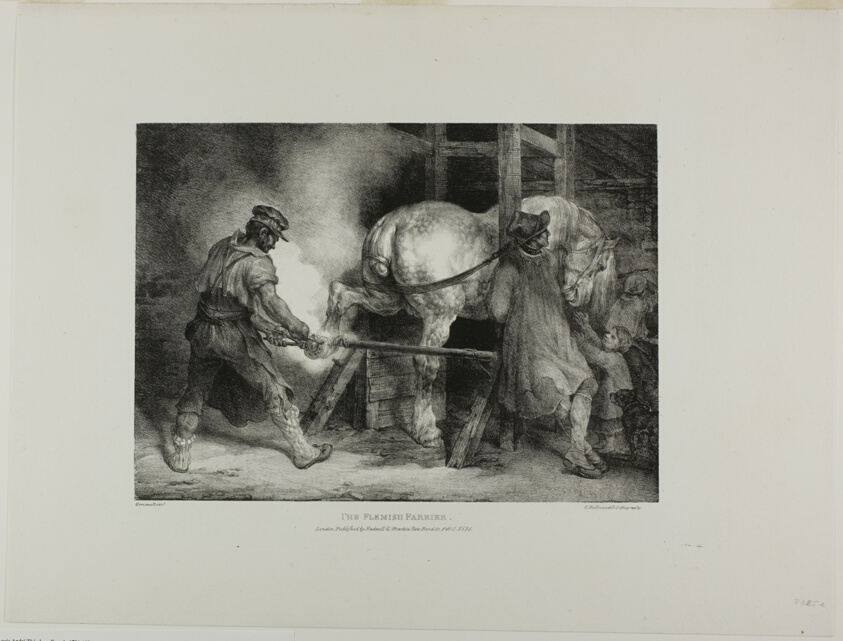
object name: Print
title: The Flemish Farrier, plate 4 from Various Subjects Drawn from Life and on Stone (The English Suite)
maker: Jean Louis André Théodore Géricault (French, 1791-1824); printed by Charles Joseph Hullmandel (German and English, 1789-1850); published by Rodwell and Martin (English, 19th century)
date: February 1821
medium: Lithograph in black on ivory wove paper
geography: France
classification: lithograph; print; prints and drawing